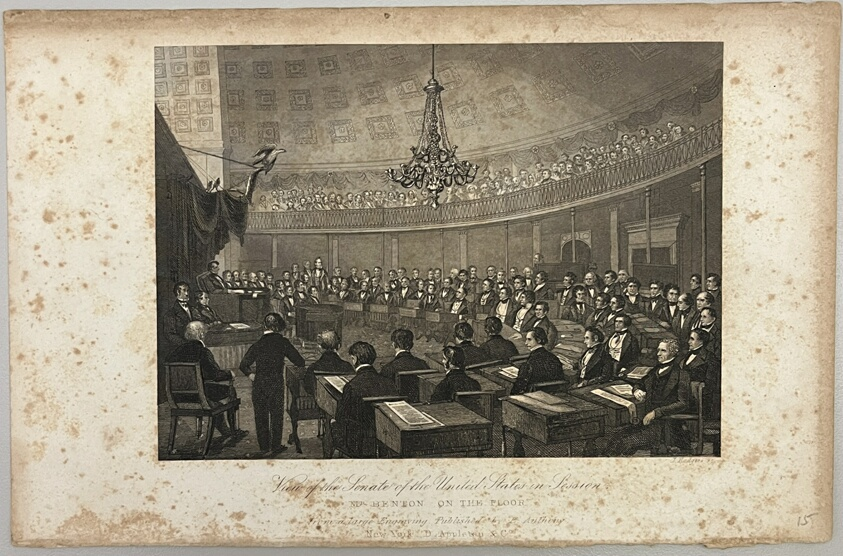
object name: Print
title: View of the Senate of the United States in Session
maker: J. Rodgers (American, 19th century)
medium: Etching on paper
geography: United States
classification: reproduction; print; prints and drawing